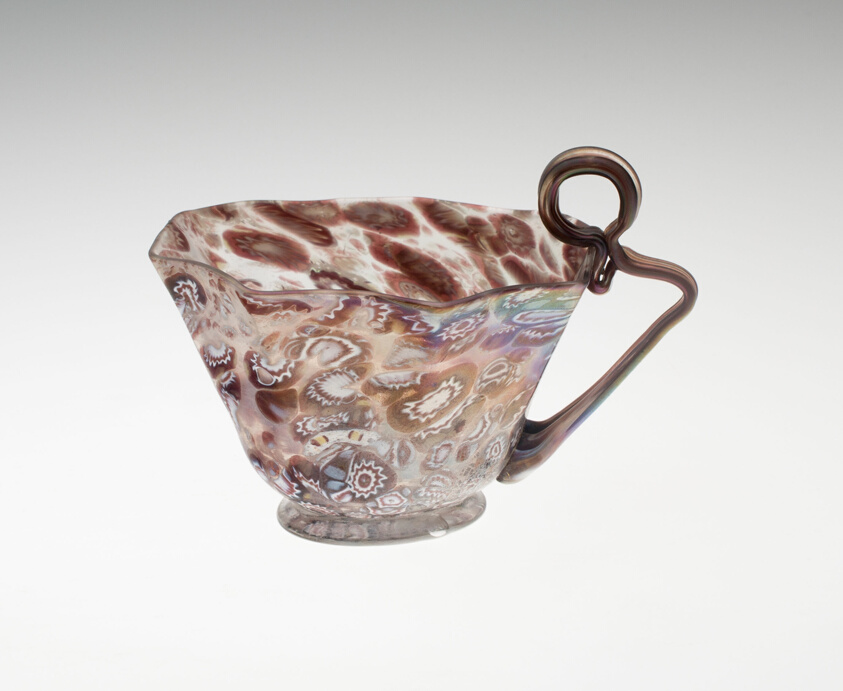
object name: Glass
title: Octagonal Cup with Handle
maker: Italy, Venice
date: 19th century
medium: Glass; iridescent with manganese and white opaque millefiori decoration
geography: Venice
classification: drinking vessel; glass; european decorative arts